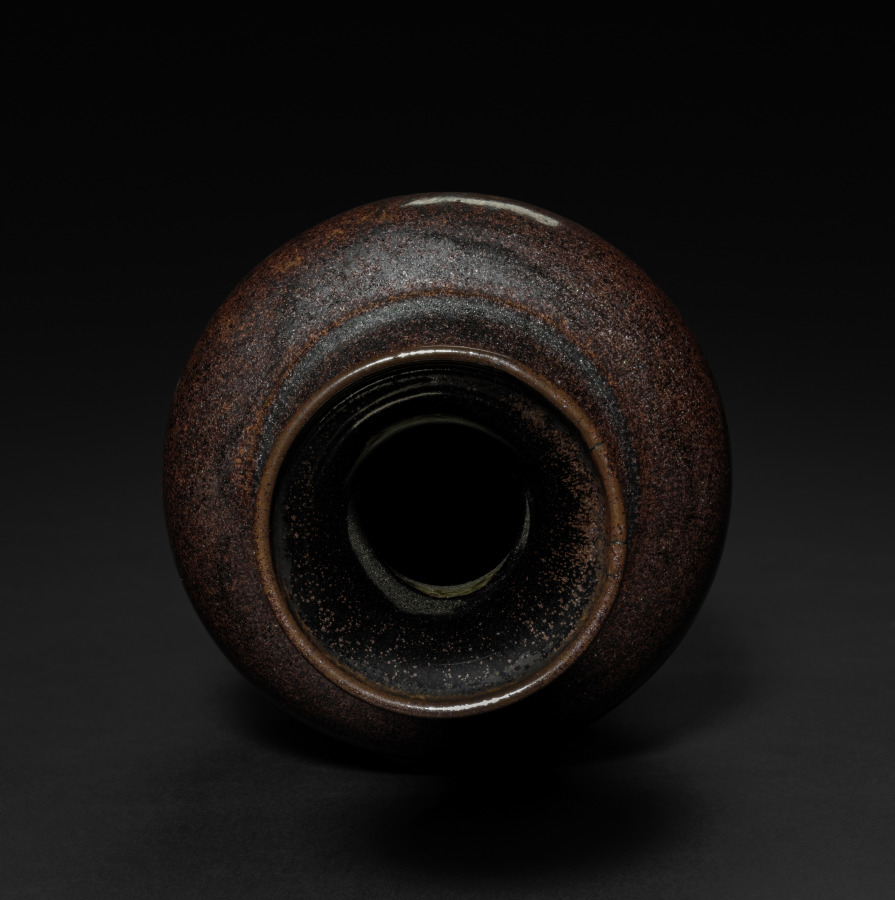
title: Vase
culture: China, Qing dynasty (1644–1911), Qianlong reign (1736–95)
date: 1736–95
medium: porcelain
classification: Ceramic